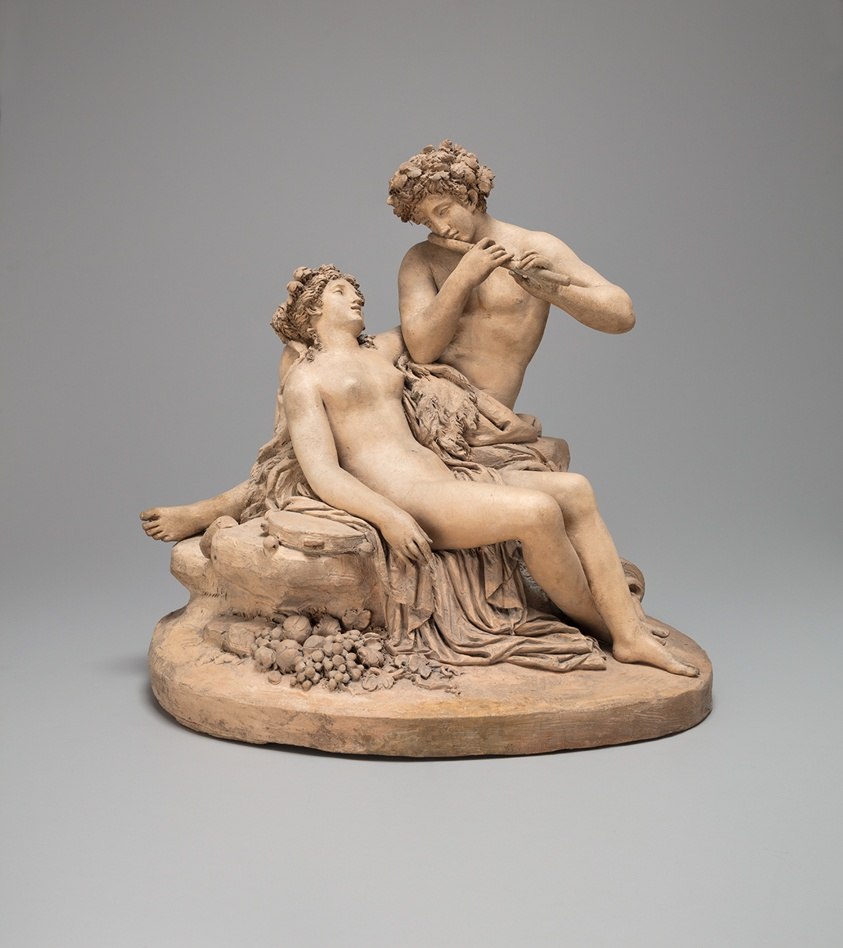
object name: Sculpture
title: Shepherd and Shepherdess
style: 18th Century, 19th century, nineteenth century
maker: Attributed to Joseph Charles Marin (French, 1759–1834)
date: 1790/1800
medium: Terracotta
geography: France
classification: statuette; sculpture; french; terracotta (sculpture)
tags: shepherds, couples, foliage, food, grapes, instruments, leaf, leaves, man, musical instruments, nudes, rocks, textile, woman